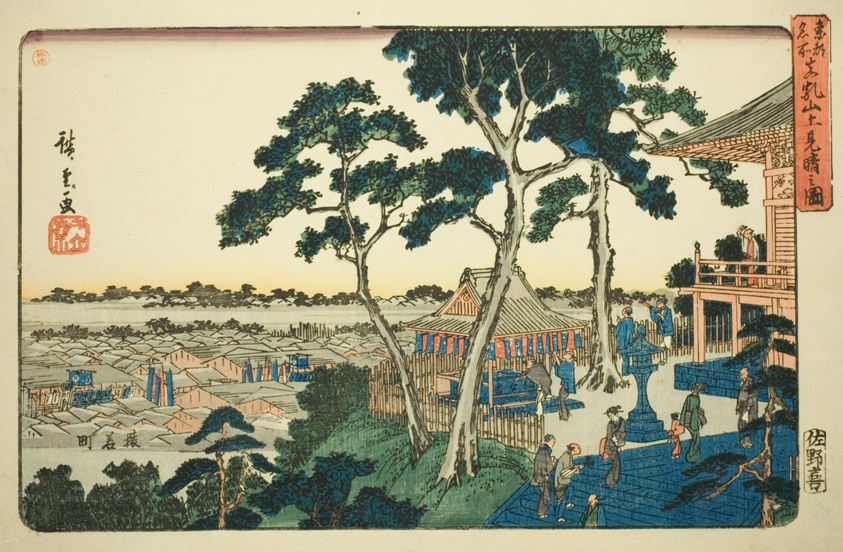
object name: Print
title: View from the Top of Matsuchi Hill (Matsuchiyama ue miharashi no zu), from the series "Famous Places in the Eastern Capital (Toto meisho)"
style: Japanese (culture or style)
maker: Utagawa Hiroshige 歌川 広重; Japanese, 1797-1858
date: c. 1832/38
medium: Color woodblock print; oban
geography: Japan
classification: woodblock print; print; asian art